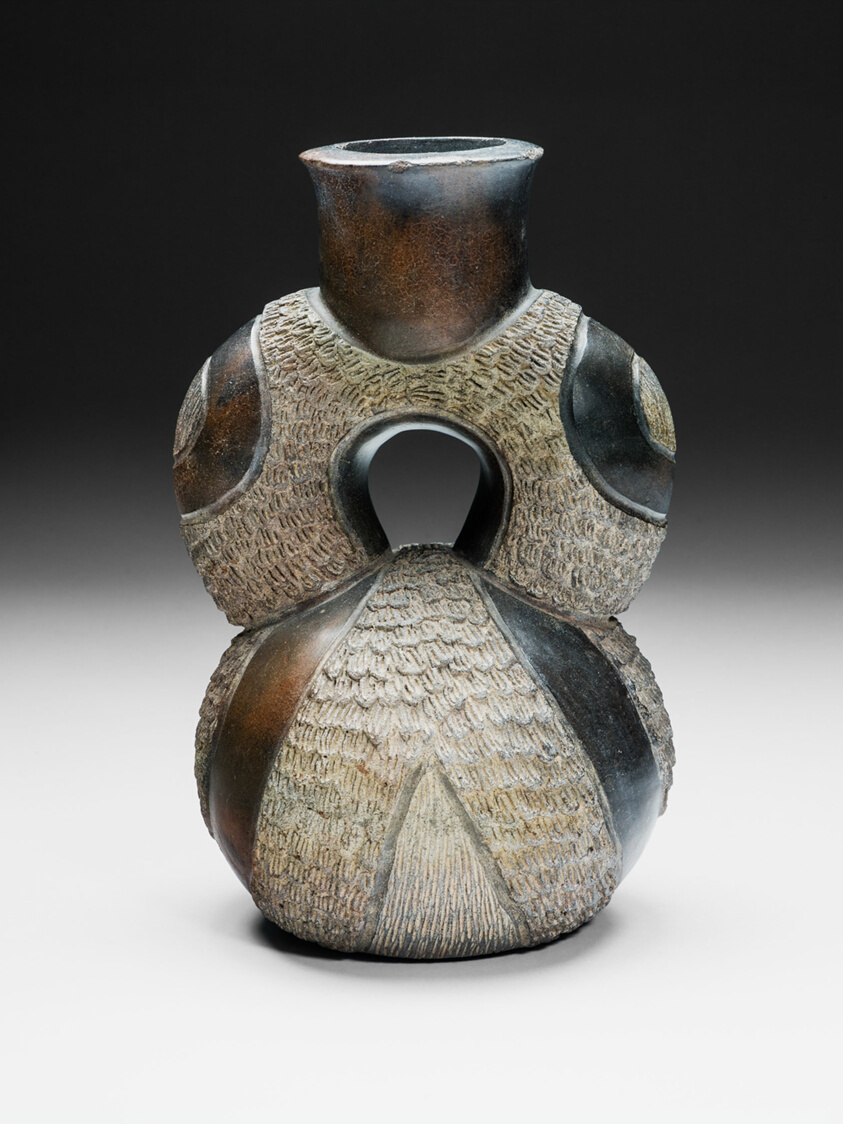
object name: Vessel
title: Stirrup Vessel with Textured Surface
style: chavín horizon, early horizon, Pre-Columbian, americas, andes, Arts of the Americas, andean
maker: Chavín (North coast, Peru)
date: c. 800 BCE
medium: Ceramic and pigment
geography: Peruvian North Coast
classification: earthenware; art of the americas; ceramics; vessel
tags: texture, geometric, servingware